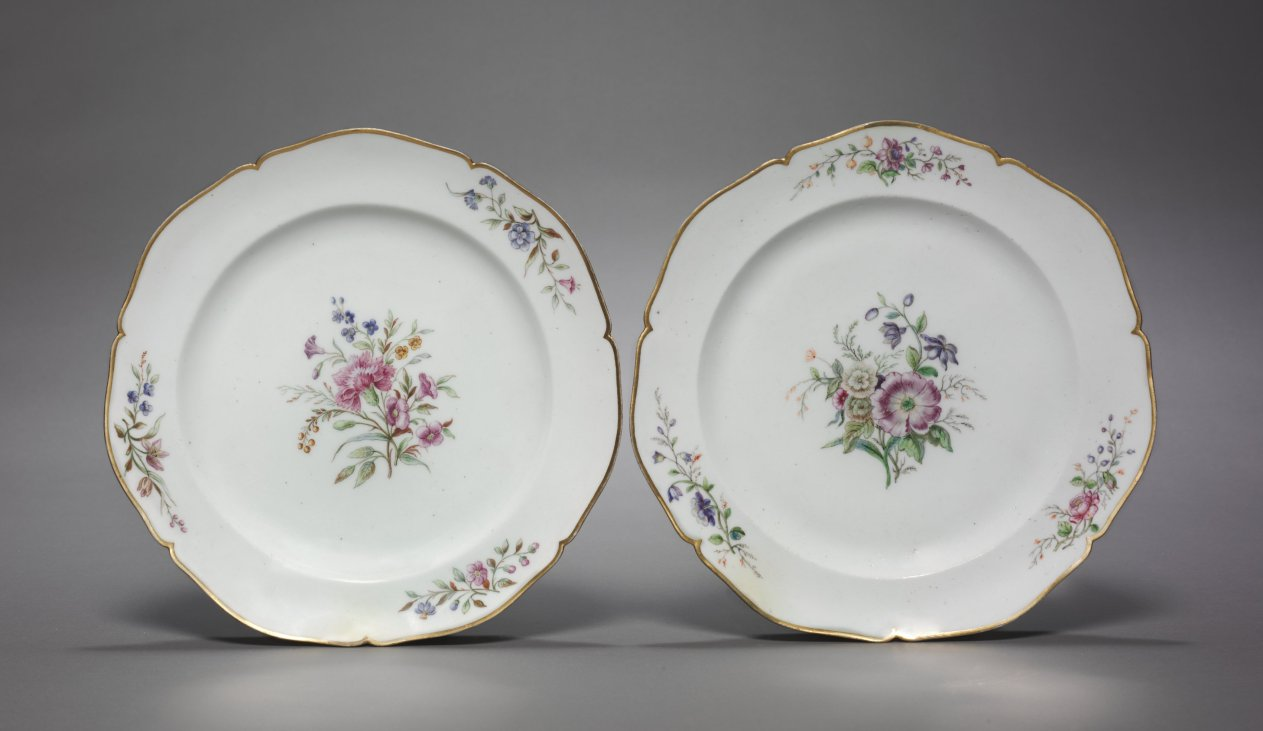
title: Pair of Plates (Assiettes)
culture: France, Vincennes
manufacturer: Vincennes Porcelain Factory (France, 1740–56)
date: c. 1748–51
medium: Soft-paste porcelain with enamel and gilt decoration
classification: Ceramic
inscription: [Interlaced 'L's with three dots: above, below and in the middle (1971.7.2)]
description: Known as “German flowers,” naturalistic floral compositions painted on Meissen factory porcelain in the 1740s influenced the paintings of French and English porcelain factories. At the Vincennes factory in the 1750s, botanically accurate flower paintings were regularly represented. The flowers seen here take inspiration from Meissen, while at the same time representing an early attempt at a distinctly French style of porcelain painting that emphasized bright, clear colors.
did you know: Though the Vincennes porcelain factory had a royal privilege for gilding as early as 1745, it was not until 1748 that they were able to put this process into practice when they bought the secret to its production from Benedictine monk, Hippolyte Lefleure.